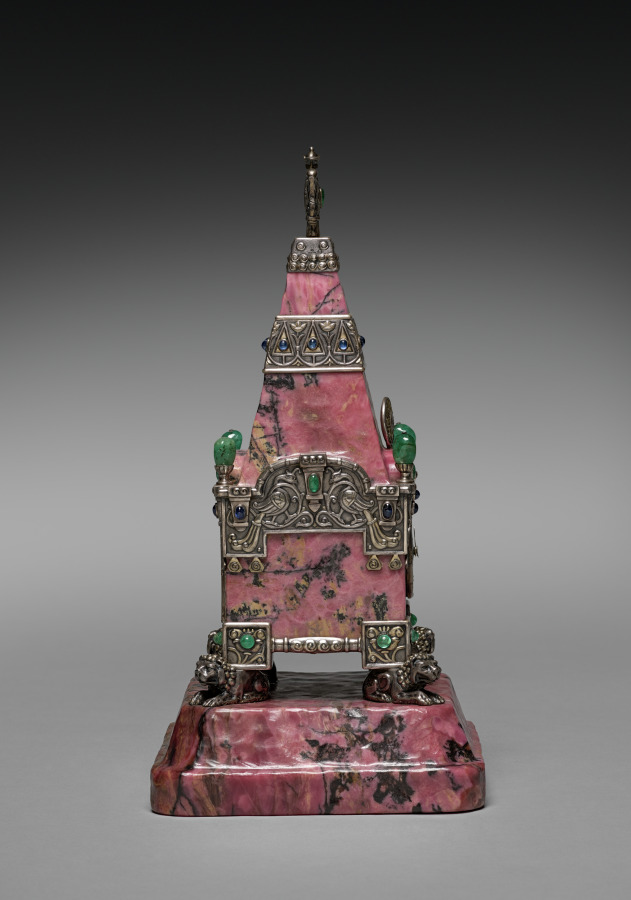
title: Kremlin Tower Clock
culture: Russia, St. Petersburg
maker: House of Fabergé (Russian, 1842–1918)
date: c. 1913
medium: rhodonite, silver, enamel, emeralds, sapphires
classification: Timepiece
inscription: 84, Kokoshnik, delta [assay mark for Moscow, 1908-26]; 91, Kokoshnik; 91; Kokoshnik; C. Fabergé (in Cyrillic); double-headed eagle [imperial warrant]; 16419 k? scratched.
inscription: Painted on clock face: Le Gruet (in script); strike, silence, set hand work (in English).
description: The use of Russian hardstones in creating precious objects became a hallmark of design from the House of Fabergé. Easily carved, these minerals were sourced largely from the western region surrounding the Ural Mountains. Fabergé's workmasters used colorful stones such as agate, nephrite (jade), lapis lazuli, rock crystal, and rhodonite, seen here in this elaborate table or mantel clock, to create all manner of luxurious accessories. Bright pink rhodonite was among the rarest, and consequently most expensive, specimens used by the House of Fabergé. This clock resembles the Taynitskaya Tower, the middle tower on the south side of the Kremlin. The House of Fabergé created this work to commemorate the 300th anniversary of the Romanov dynasty, representing Fabergé's ability to balance the functionality of objects with intricate decorative design.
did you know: The Kremlin tower, which this clock resembles, has a secret well and an underground tunnel that leads to the Moscow River.